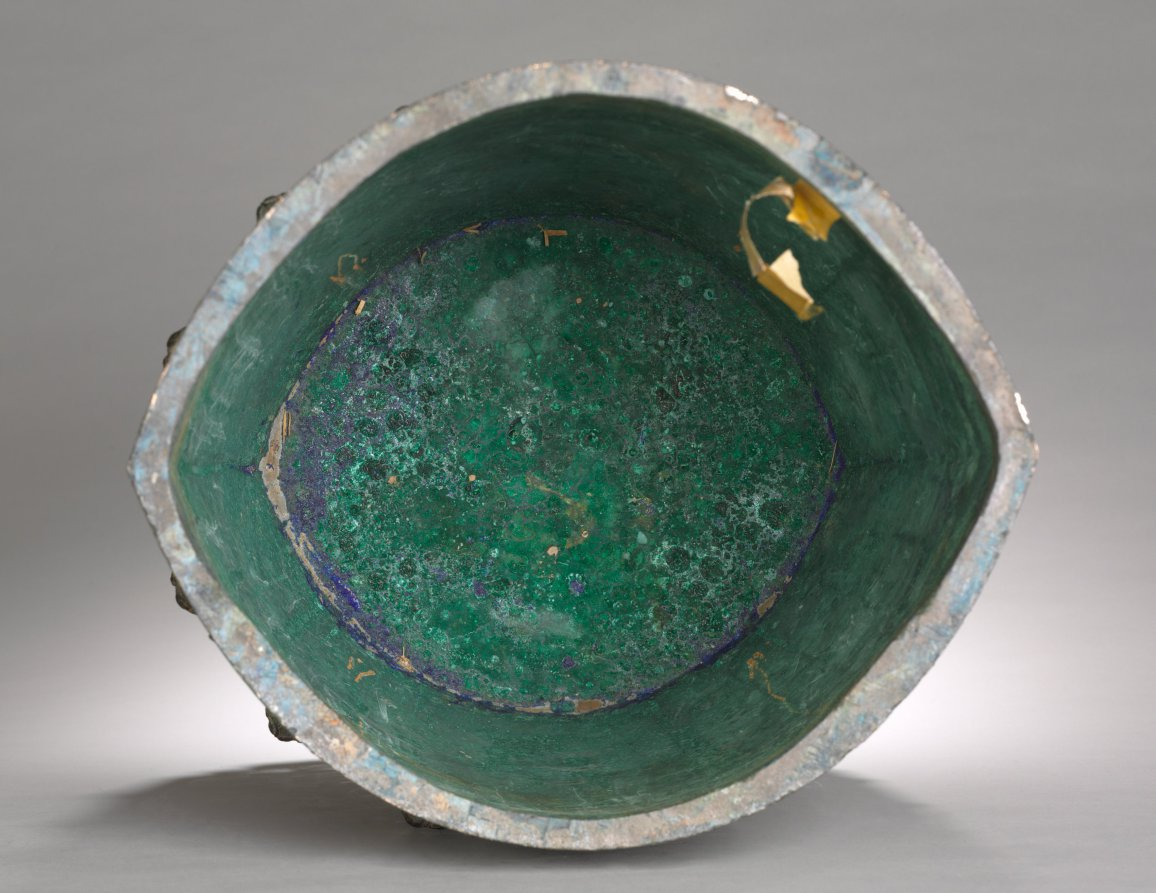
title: Bell (Bo Zhong)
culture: China, Eastern Zhou dynasty (770–256 BCE)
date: early 400s BCE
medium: bronze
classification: Metalwork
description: Music in the Eastern Zhou dynasty not only served ritual purposes but also provided entertainment in feudal courts. The elliptical cross-section of the Chinese bronze bell is unique; it could produce two notes depending on where the bell is struck, either at the rim or near the center. The bell is suspended when played and often belongs to a graduated set arranged according to pitch and size. This bell displays elaborate ornamentation and exquisite workmanship. A twin-bodied serpent intertwined with two tigers forms the suspension loop at the top. Coiled serpents form the knobs on the body. The lower part bears an animal mask, its horns interlaced with abstract bird designs.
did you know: The bell could produce two notes depending on where it is struck.